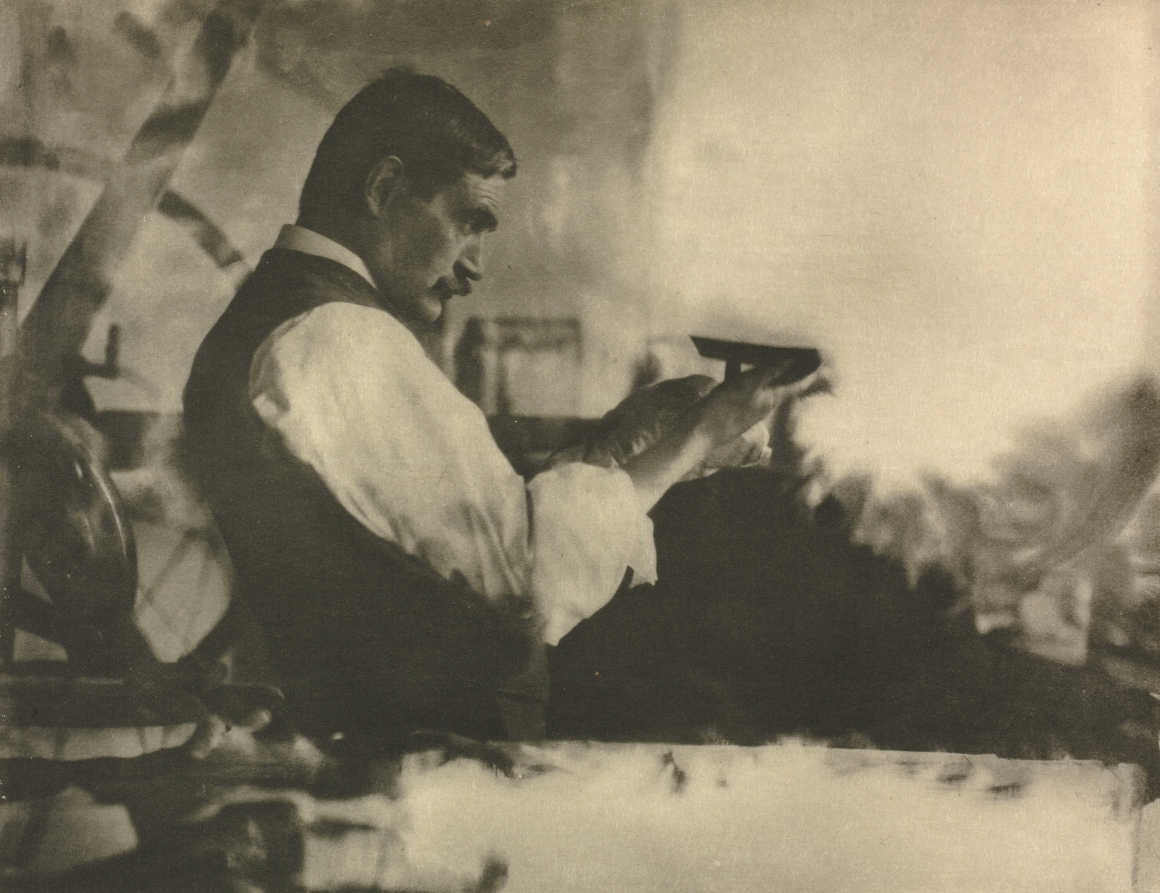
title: Camera Work: The Etching Printer - William Strang, Esq., A.R.A.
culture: England, 20th century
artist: J. Craig Annan (British, 1864–1946)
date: 1907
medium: photogravure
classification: Bound Volume